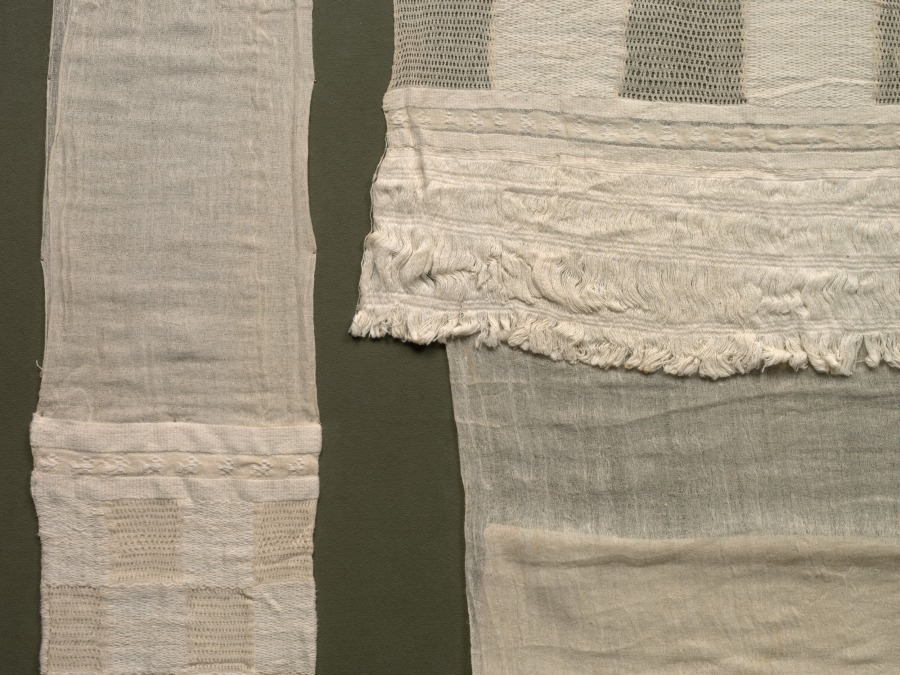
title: Loincloth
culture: Peru, North Coast, Chimú style, 1200–1460s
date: 1425–1500 (radiocarbon date, 92.3% probability)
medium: cotton; plain weave, brocaded and complex alternating gauze with 5 shots of plain weave between gauze shots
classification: Garment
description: Loincloths were basic men’s wear in ancient Peru. But the extraordinary size of some examples—this one is about eight feet long, unfolded—makes it difficult to know how they were worn, except that they were tied around the waist with the decorated panels hanging at the front and back of the body. The appearance may have been that of a billowing skirt.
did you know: This loincloth is huge!